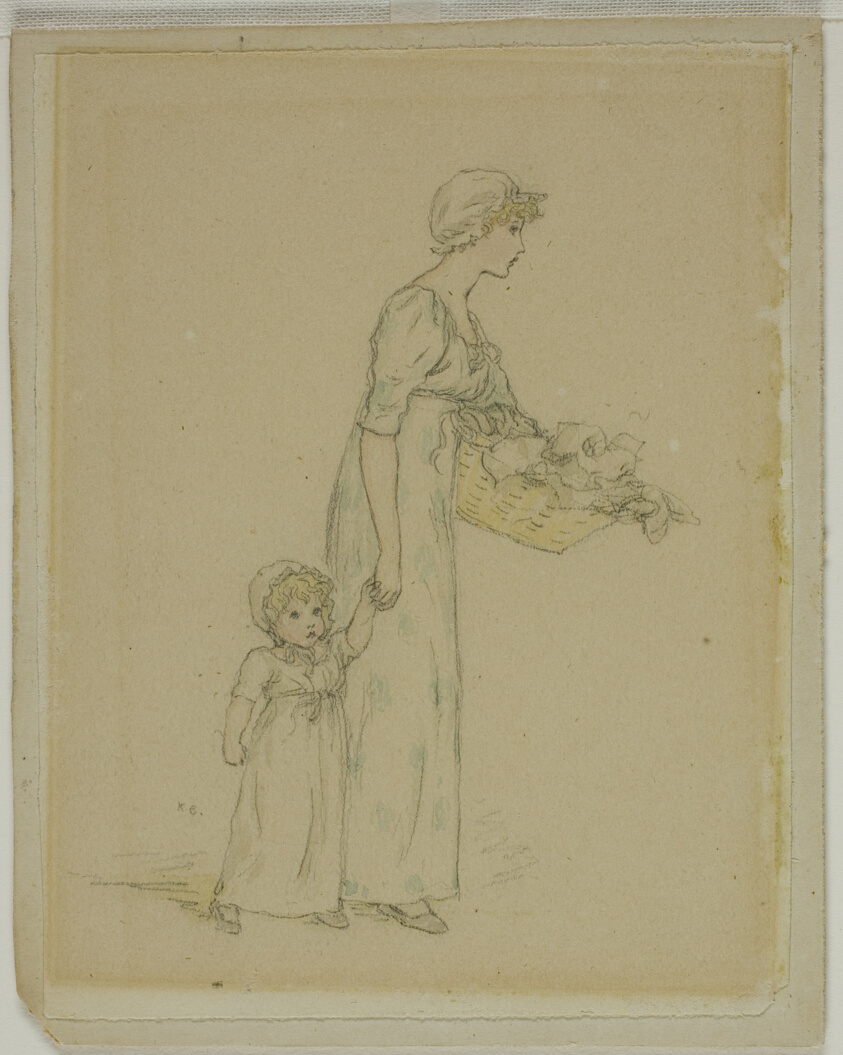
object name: Drawing and Watercolor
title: Woman with Child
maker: Kate Greenaway (English, 1846-1901)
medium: Graphite and watercolor on cream wove paper (discolored to tan), laid down on cream wood-pulp laminate board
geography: England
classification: graphite; drawings (visual works); prints and drawing